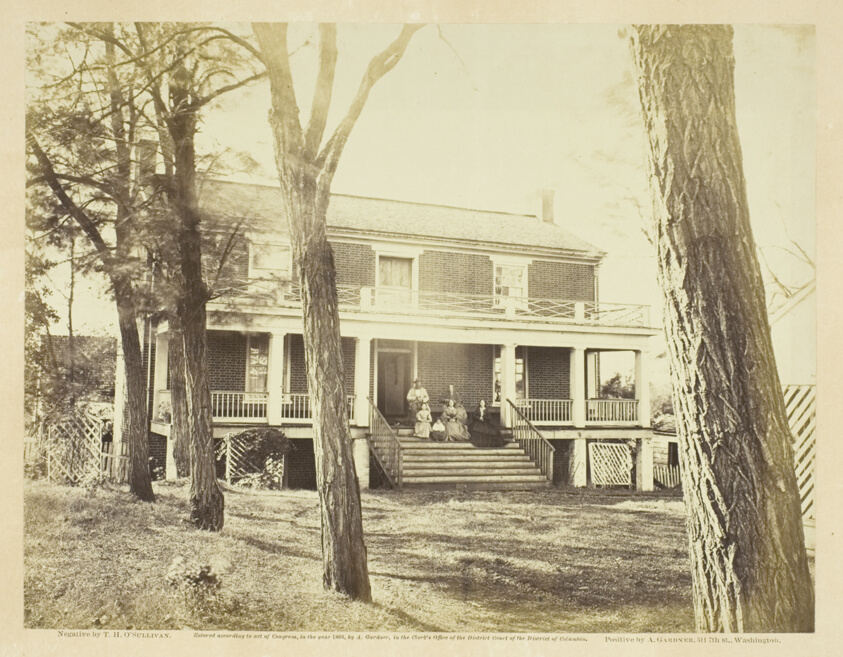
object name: Photograph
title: McLean's House, Appomattox Court-House, Virginia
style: 19th century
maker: Timothy O'Sullivan (American, born Ireland, 1840–1882); printed by Alexander Gardner (American, born Scotland, 1821–1882)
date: April 1865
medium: Albumen print, pl. 99 from the album "Gardner's Photographic Sketch Book of the War, Volume II" (1866)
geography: United States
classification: photograph; albumen silver print; photography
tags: Collected by Hugh Edwards, Gardner's Photographic Sketch Book